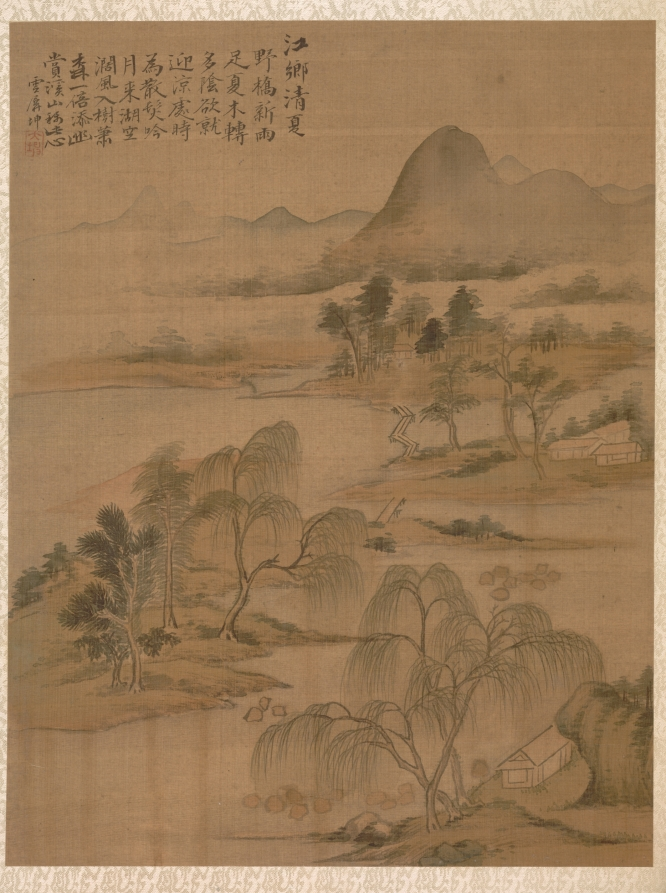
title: River Village in High Summer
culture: China, Qing dynasty (1644-1911)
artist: Zhai Dakun (Chinese, d. 1804)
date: 1775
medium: album leaf; ink and color on silk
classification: Painting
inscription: River Village in High Summer. New rain has soaked the rustic bridge, The summer trees cast abundant shade. One wants to go among them and find a cool spot, From time to time one laughs, one's hair disheveled. The moon shines over the vast empty lake, The wind blows through the lonely trees. These add completely to one's secret enjoyment, Streams and mountains accord with this mind. Yunping Kun. Seal: r/r "Dakun"